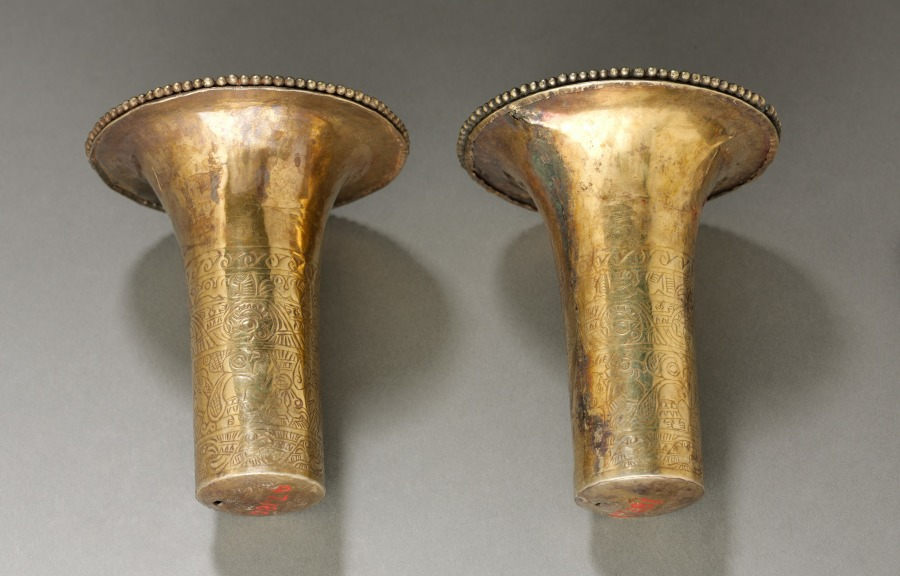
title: Pair of Ear Flares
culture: Peru, North Coast, Chimú style (900-1470)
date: 900–1470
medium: hammered gold alloy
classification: Metalwork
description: North Coast ear ornaments typically have a long shaft that balanced the weight of the glorious frontal. This pair illustrates Chimú interest in the sea, which had great economic and religious importance. On the shafts are bands of seabirds and waves, and a similar pattern edges the frontals, which were altered in modern times. Originally solid disks, the frontals' centers were cut out and a dotted band was added to the rim.